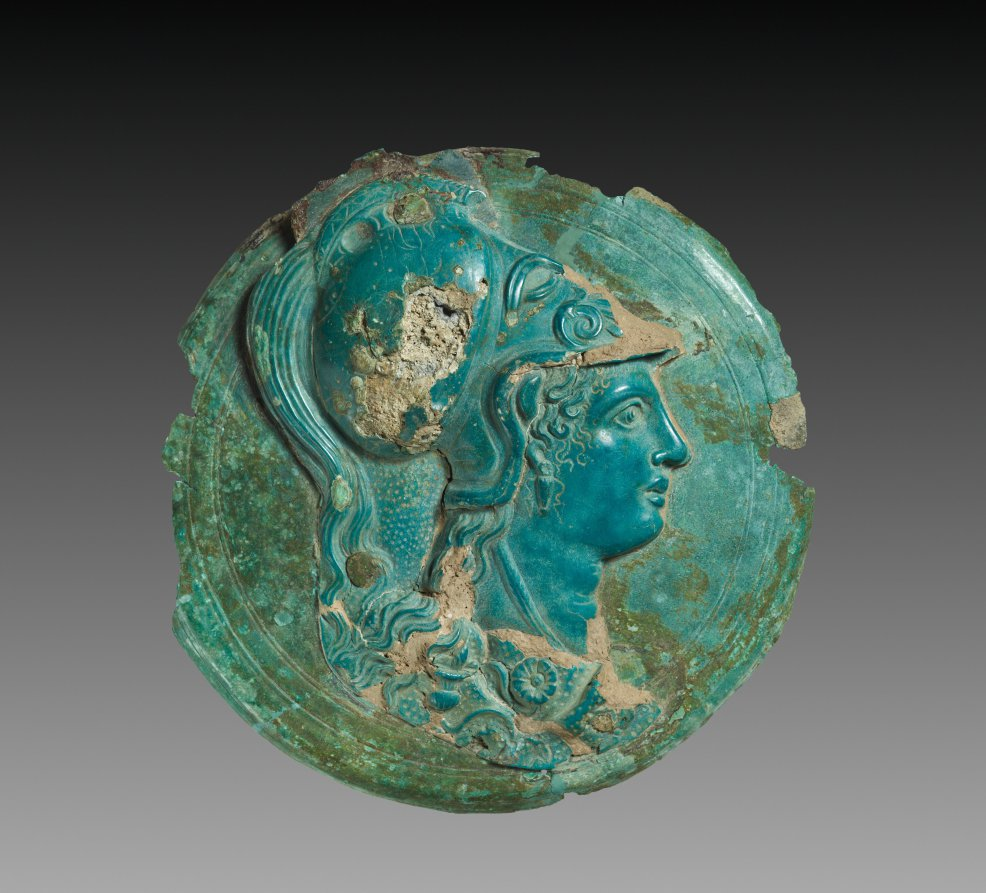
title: Box Mirror with Head of Athena (lid)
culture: Greece, Hellenistic period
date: 330–270 BCE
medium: bronze, partially gilt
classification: Metalwork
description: The ancient Greek box mirror resembles a modern, hinged makeup compact in design. While the actual mirror is the top of the bottom half of the box – a highly polished cast-bronze disk – the cover often bears relief decoration. This example features a helmeted head of Athena, a virgin war goddess not typically associated with implements of beauty. Several other aspects suggest that this Athena may have been repurposed from another object in antiquity: the striking difference in patina between relief and case; the irregular (non-circular) shape; and the method of attachment, with rivets through the relief rather than solder.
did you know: The head of Athena on this mirror likely came from a different ancient object.